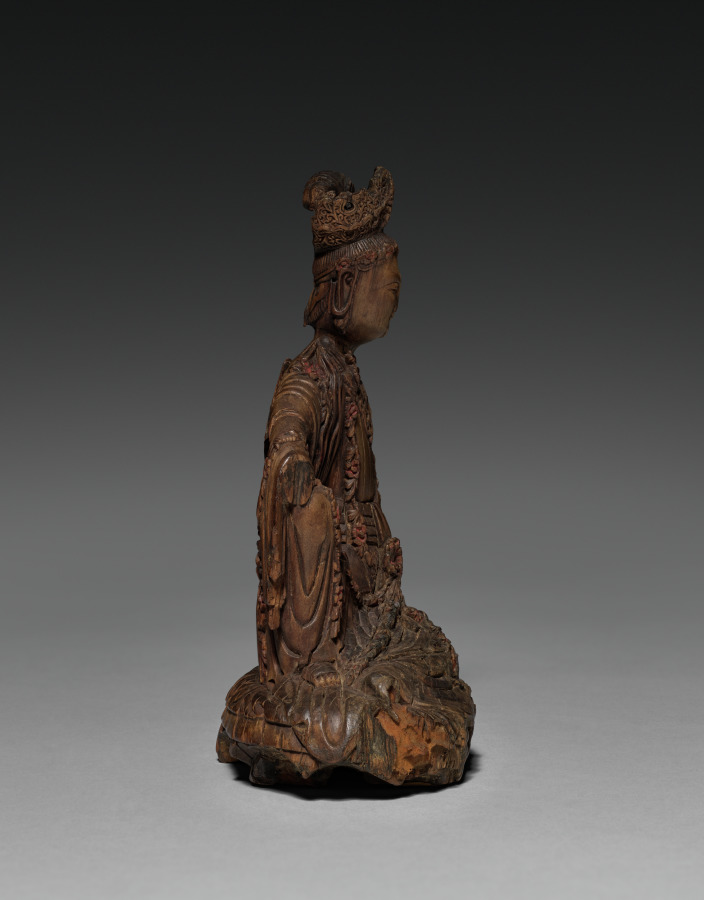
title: Potalaka Guanyin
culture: China, Five dynasties (907-960)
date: 900s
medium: Carved sandalwood with traces of paint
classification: Sculpture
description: This portable figure of Guanyin, the Bodhisattva of Compassion who vowed to stay on earth to help human beings, is carved of precious sandalwood. It is lavishly covered with garlands of flowers that retain traces of the original red paint. The small sculpture may have been used in a private devotional context.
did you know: Mount Potala is the mythical home of the bodhisattva Avalokiteśvara, called Guanyin in Chinese.